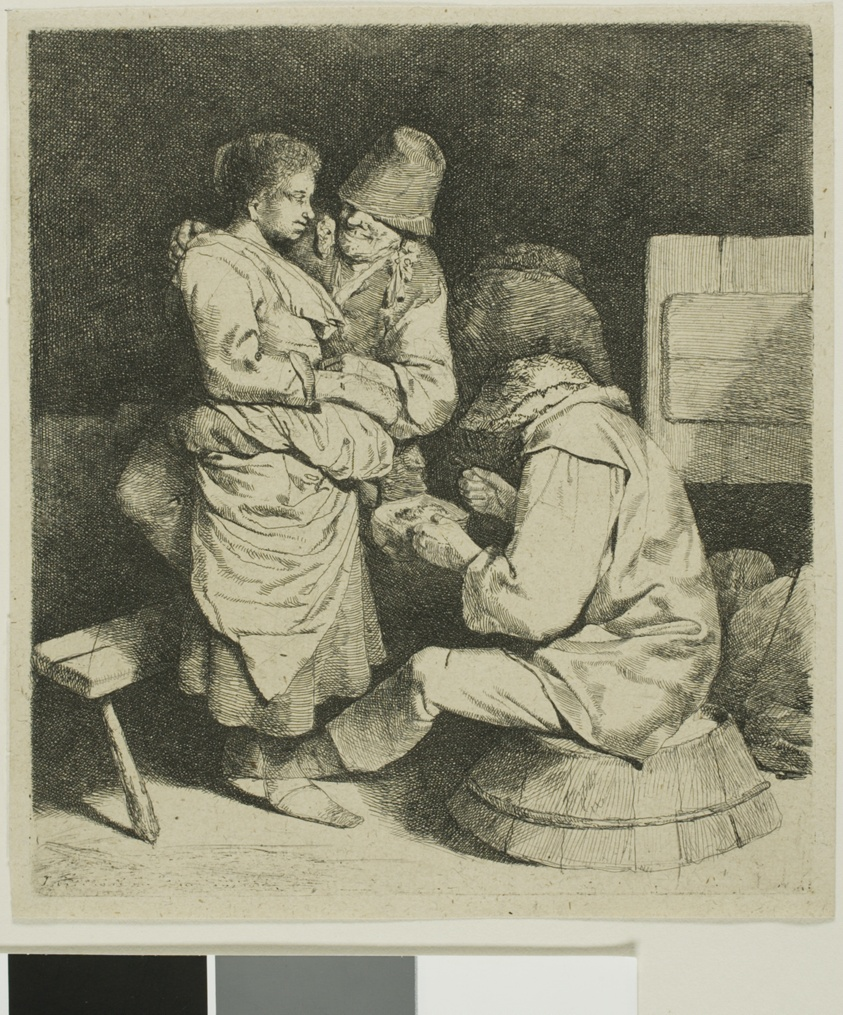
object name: Print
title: The Young Innkeeper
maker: Cornelis Pietersz Bega; Dutch, 1631/32-1664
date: c. 1650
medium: Etching on cream laid paper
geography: Netherlands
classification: etching; print; prints and drawing